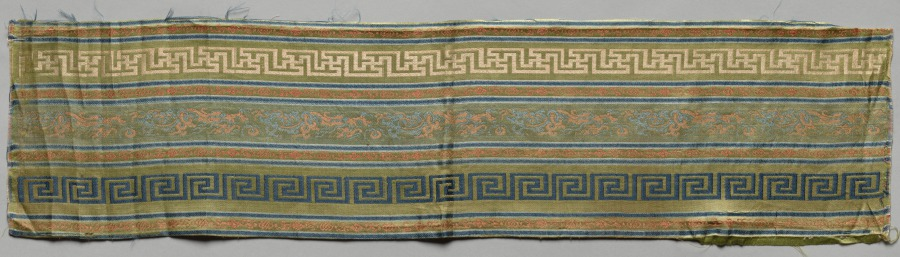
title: Fragment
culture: China, 19th century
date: 1800s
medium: silk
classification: Textile